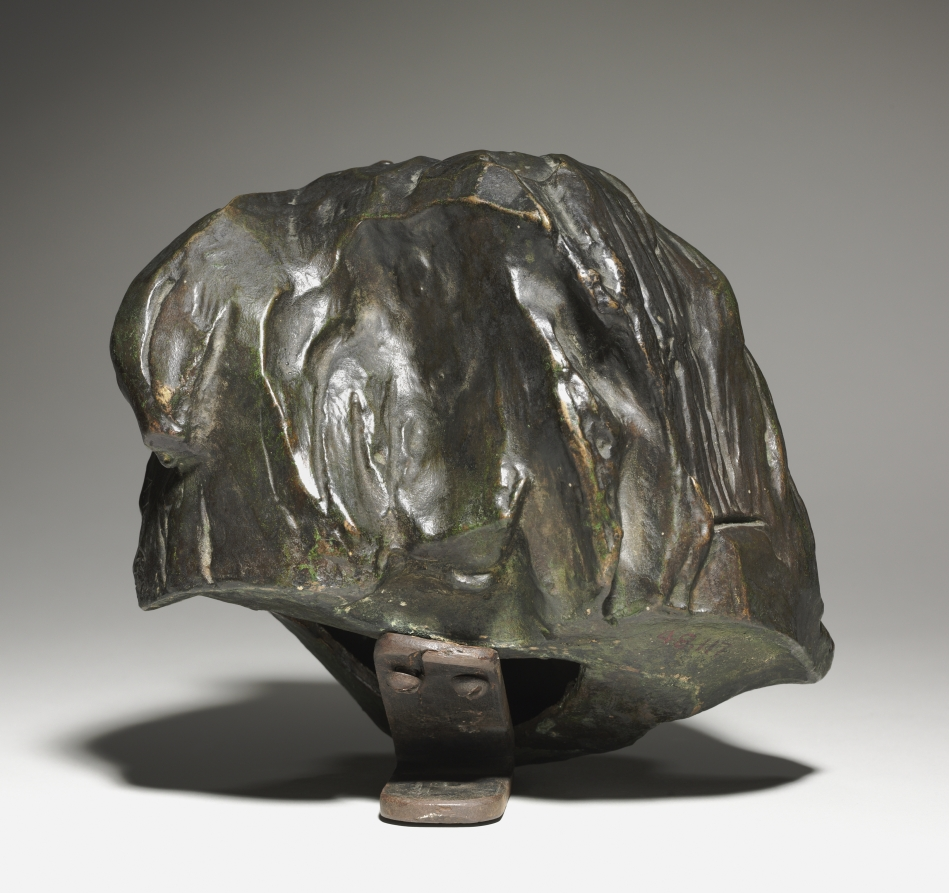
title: Study for the Head of the Monument to Honoré de Balzac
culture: France, late 19th-early 20th Century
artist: Auguste Rodin (French, 1840–1917)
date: 1893–1897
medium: bronze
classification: Sculpture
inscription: Signed on hair to right: "A. Rodin"